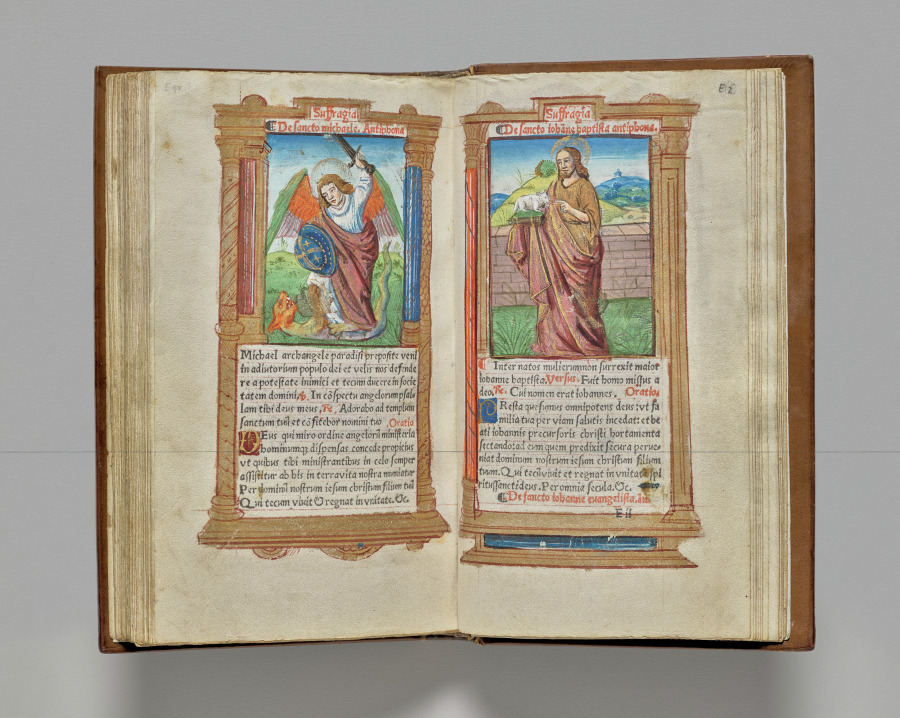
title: Printed Book of Hours (Use of Rome): fol. 98r, St. John the Baptist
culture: France, Paris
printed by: Guillaume Le Rouge (French, Paris, active 1493–1517)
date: 1510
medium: 112 Printed folios on parchment, bound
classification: Bound Volume